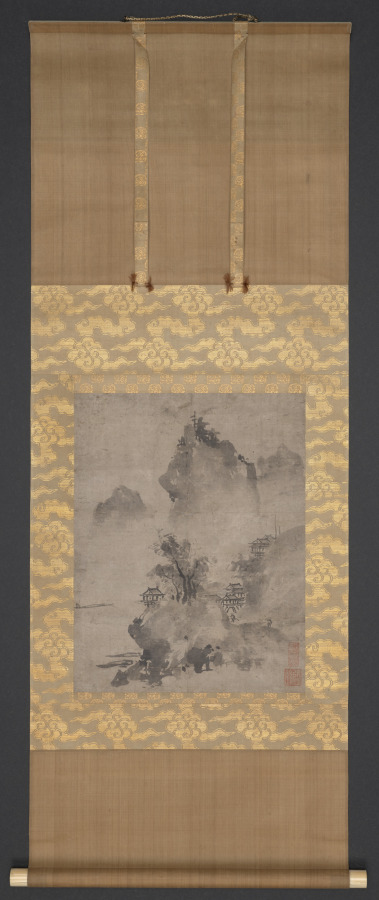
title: Coastal Landscape in the Haboku Style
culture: Japan, Muromachi period (1392–1573)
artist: Keison (Japanese, active late 15th to early 16th century)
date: late 1400s–early 1500s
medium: hanging scroll, ink on paper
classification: Painting